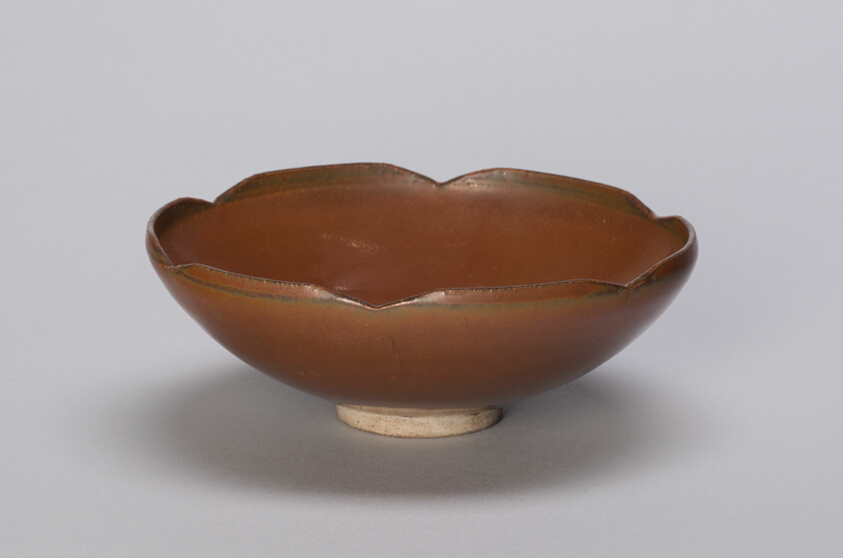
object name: Vessel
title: Persimmon Bowl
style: Chinese (culture or style)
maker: China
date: Northern Song dynasty (960–1127), 11th/12th century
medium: Russet Yaozhou ware; light grey stoneware with russet-surfaced dark brown glaze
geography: China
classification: bowl; dish (vessel); ceramics; vessel